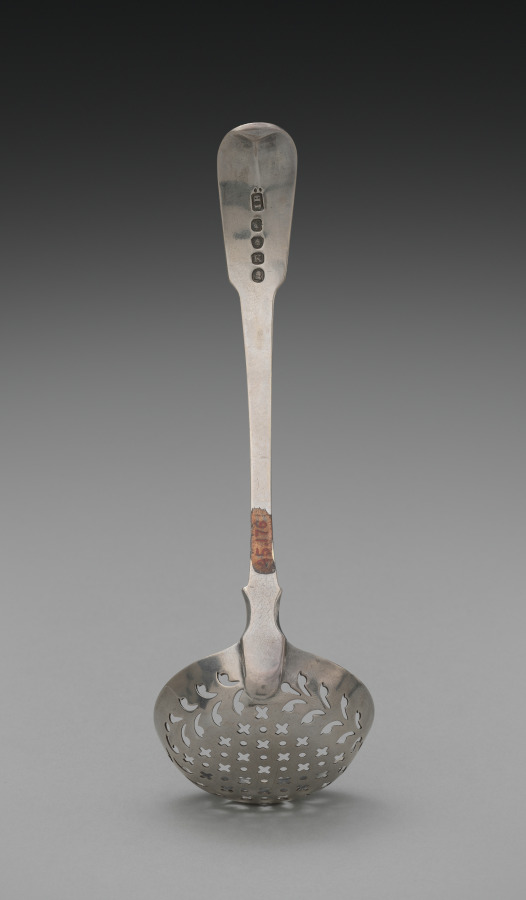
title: Sugar Sifter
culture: England, London, early 19th Century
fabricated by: John Beldon (British)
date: 1805–1806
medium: silver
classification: Silver